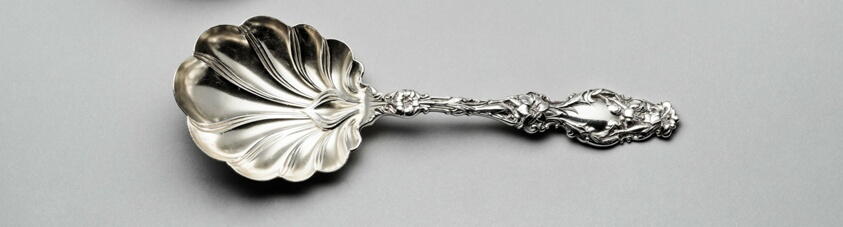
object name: Metalwork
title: Berry Spoon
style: 20th Century, Arts and Crafts Movement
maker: Whiting Manufacturing Co. (American, 1866–1926); New York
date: 1902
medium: Silver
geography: New York City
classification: utensil for serving food; silver; utensil; spoon; american decorative arts; american arts; decorative arts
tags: spoon, shells, flowers, dining, eating